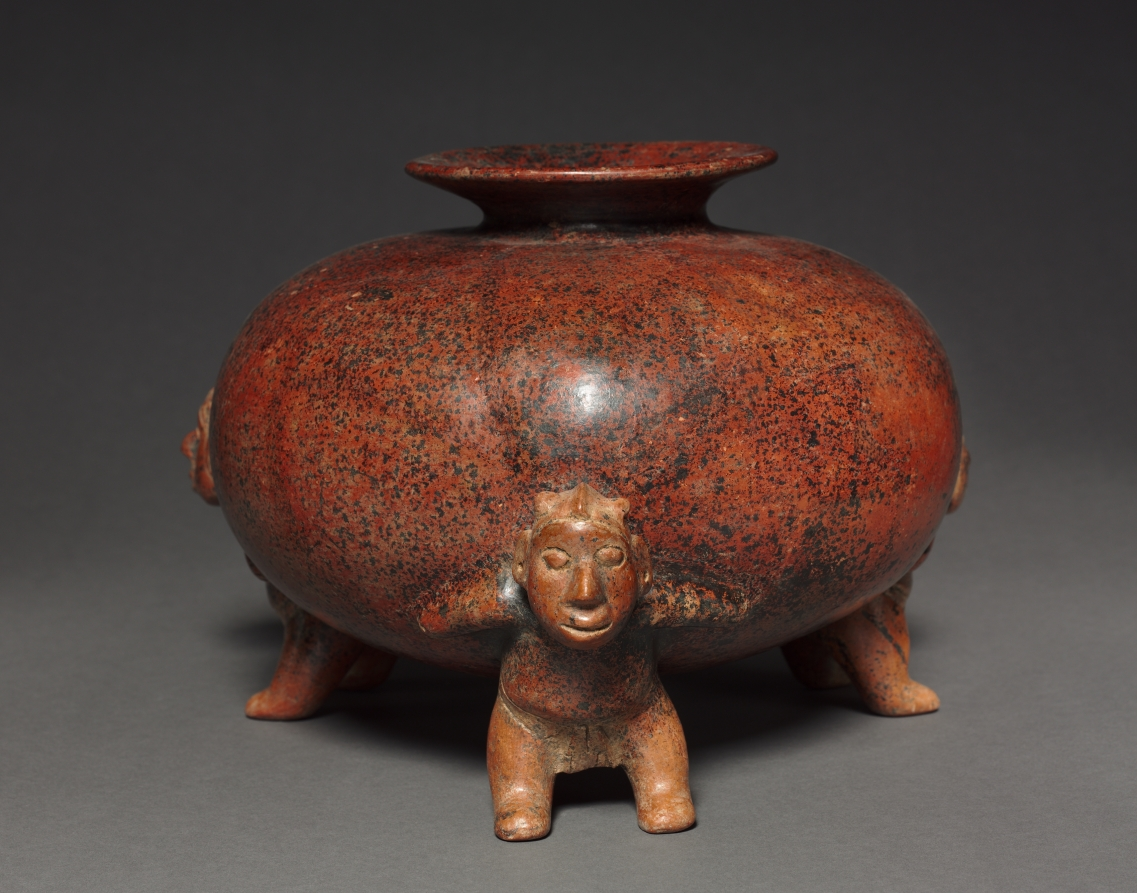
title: Vessel with Crested Atlantean (Supporting) FIgures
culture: West Mexico, Colima, Comala style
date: 200 BCE–300 CE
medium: earthenware with colored slip, black burial deposits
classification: Ceramic